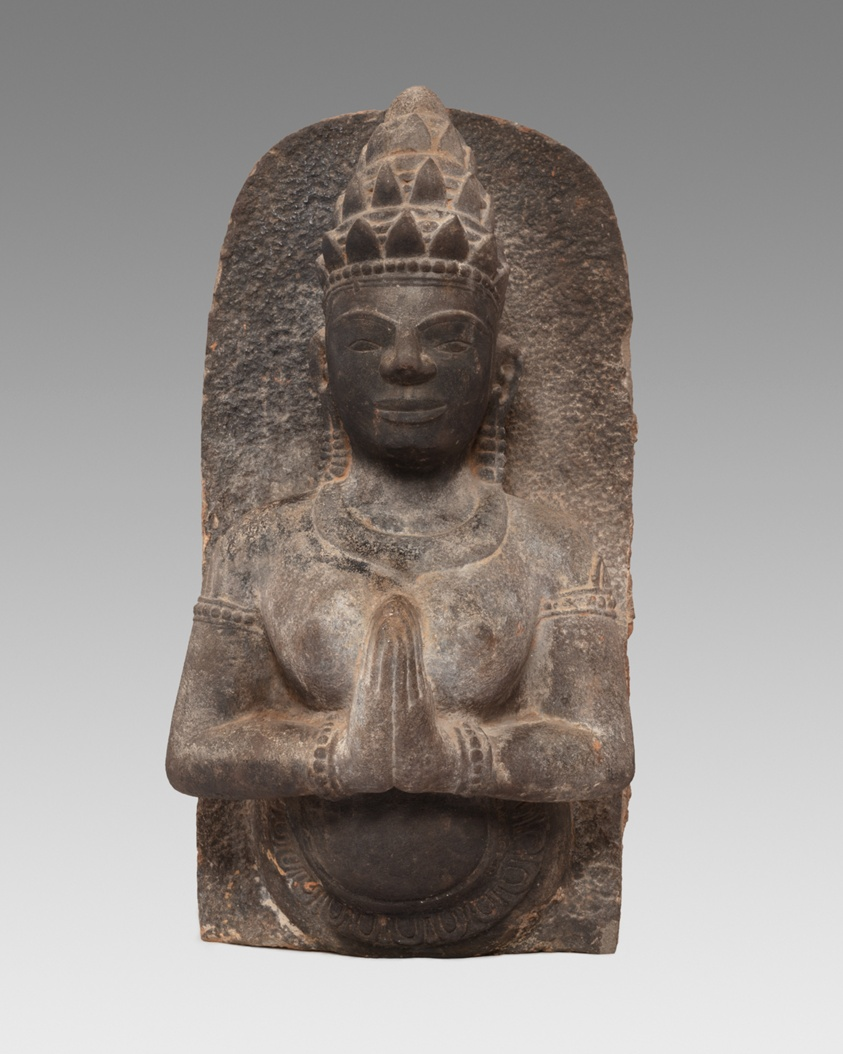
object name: Sculpture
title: Celestial Beauty (Apsara) in Adoration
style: Southeast Asian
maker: Vietnam; Binh Dinh province, Thu Thien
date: Champa period, about 1100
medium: Sandstone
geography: Vietnam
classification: sandstone; stone; sculpture; asian art